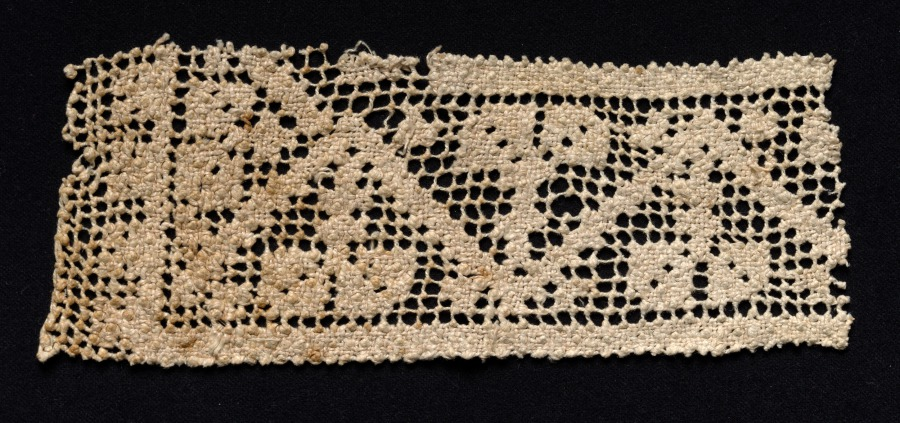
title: Fragment of a Band with Abstract Pattern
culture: Spain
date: 1600s–1700s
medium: Bleached linen (est.): needle lace, filet/lacis (knotted ground and darned in two directions)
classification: Lace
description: The thick and graphic darning, or area of woven pattern, depicts triangular and circular geometric motifs. In addition to the knotting of the thread (filet/lacis technique), the lace maker used thicker thread to create the bold and heavy pattern.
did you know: Myrta Leonora Jones, the donor of this work, was a women’s rights activist in Cleveland in the early 20th century.